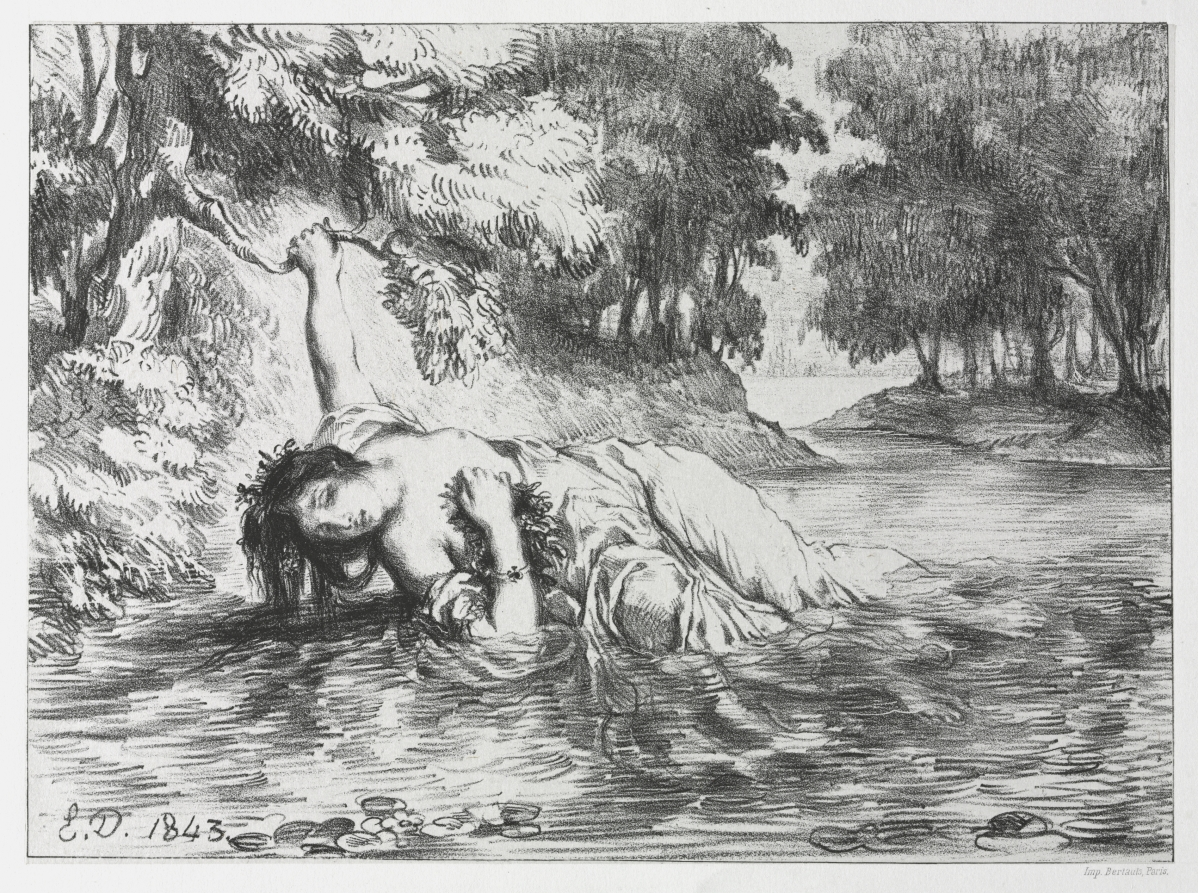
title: Hamlet: The Death of Ophelia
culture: France, 19th century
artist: Eugène Delacroix (French, 1798–1863)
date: 1843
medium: lithograph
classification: Print